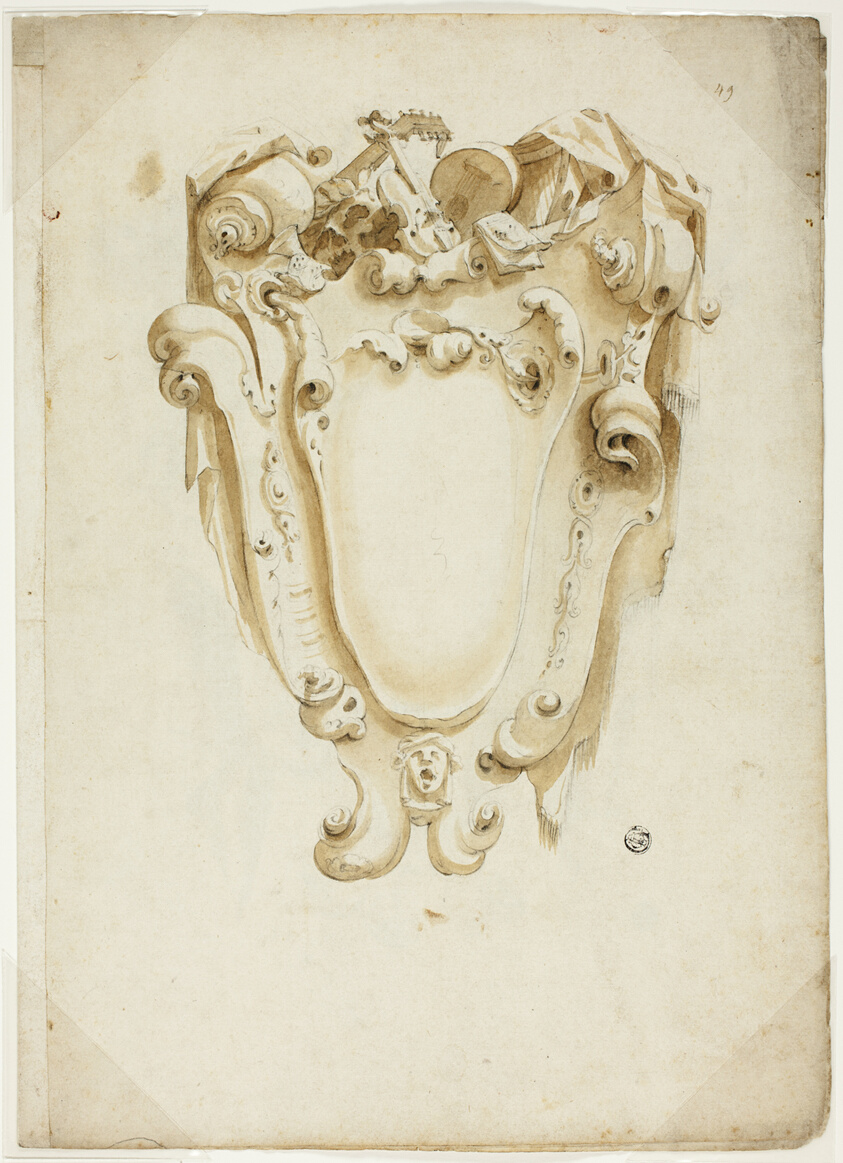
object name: Drawing and Watercolor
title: Design for Escutcheon, with Musical Instruments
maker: Unknown Artist; possibly Italian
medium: Black chalk and brush and brown wash on ivory laid paper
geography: Italy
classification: chalk; drawings (visual works); prints and drawing